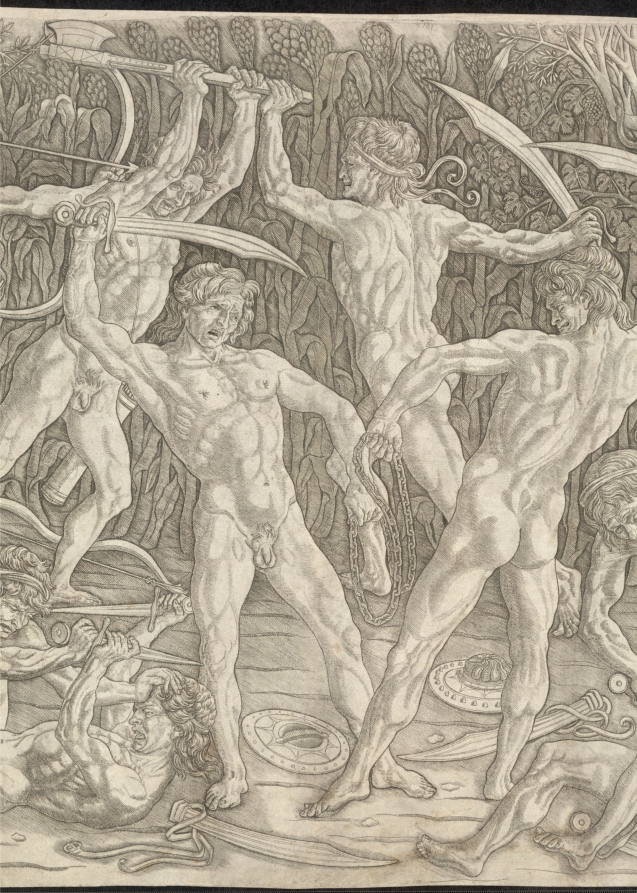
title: Battle of the Nudes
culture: Italy, 15th century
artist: Antonio del Pollaiuolo (Italian, 1431/32–1498)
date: 1470s–80s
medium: engraving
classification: Print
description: This engraving is one of the earliest Renaissance prints to portray the nude male body in action. Antonio del Pollaiuolo’s grimacing warriors appear like clones in different poses. The print may have functioned as a model for workshop apprentices studying human anatomy while learning to draw; however, the artist’s Latin signature suggests it also had an audience educated in literature. Art historians remain uncertain whether Pollaiuolo intended to depict a particular story or historical event. It is possible he created a deliberately ambiguous allegory that would appeal to patrons interested in interpreting symbols. For example, the continuous chain shared by the two central men could refer to an ancient idea that the body is the chain of the soul, only to be released in death.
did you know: Considered a groundbreaking work in the history of the Italian Renaissance, the CMA holds the only known impression of the print's first state.